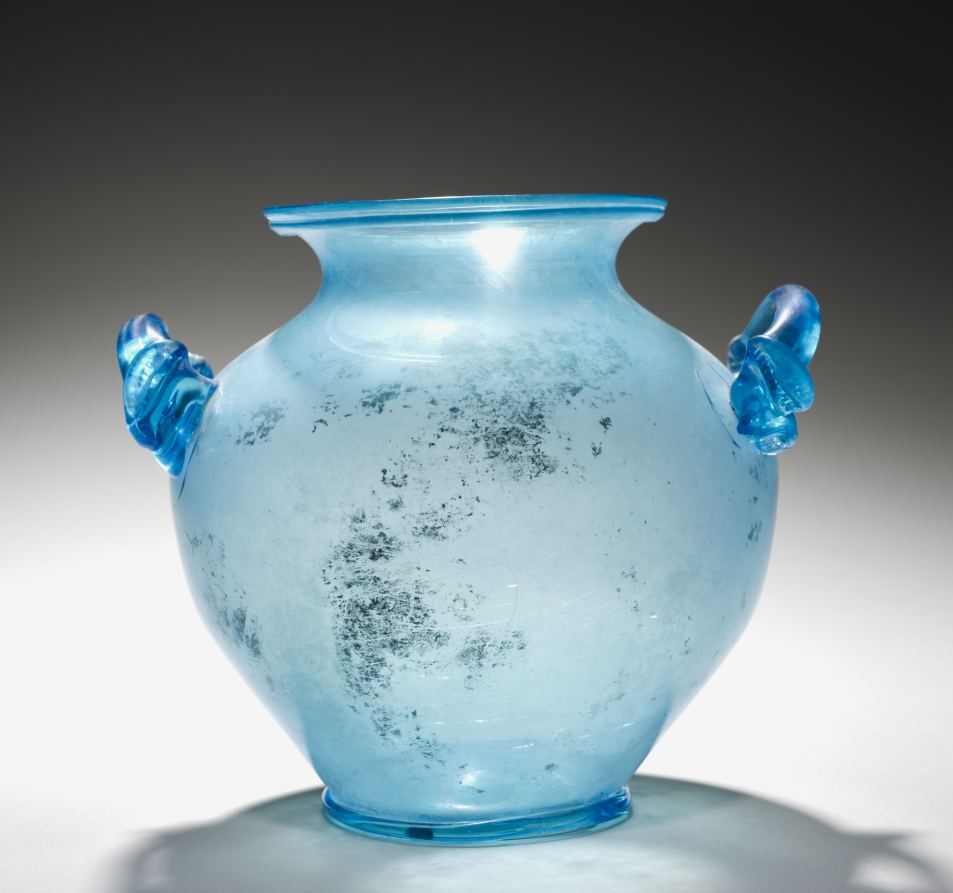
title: Cinerary Urn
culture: Italy, Roman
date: 1–200 CE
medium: glass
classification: Glass